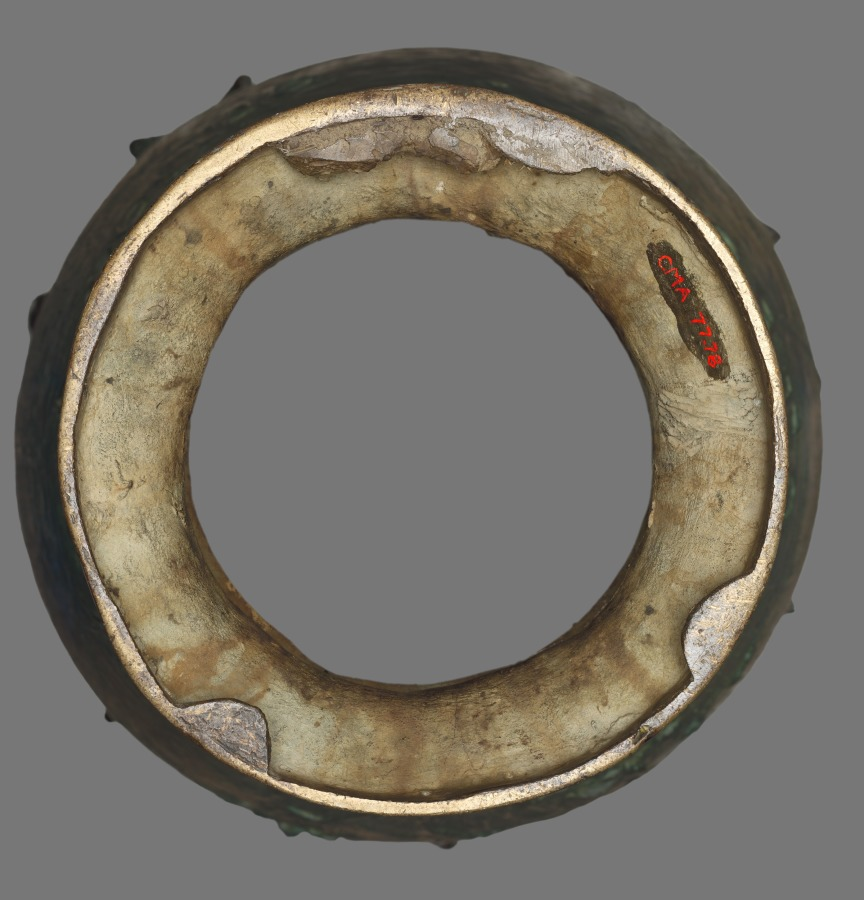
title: Vase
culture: France, 19th century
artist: Gustave-Joseph Chéret (French, 1838–1894)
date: c. 1890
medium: bronze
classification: Sculpture